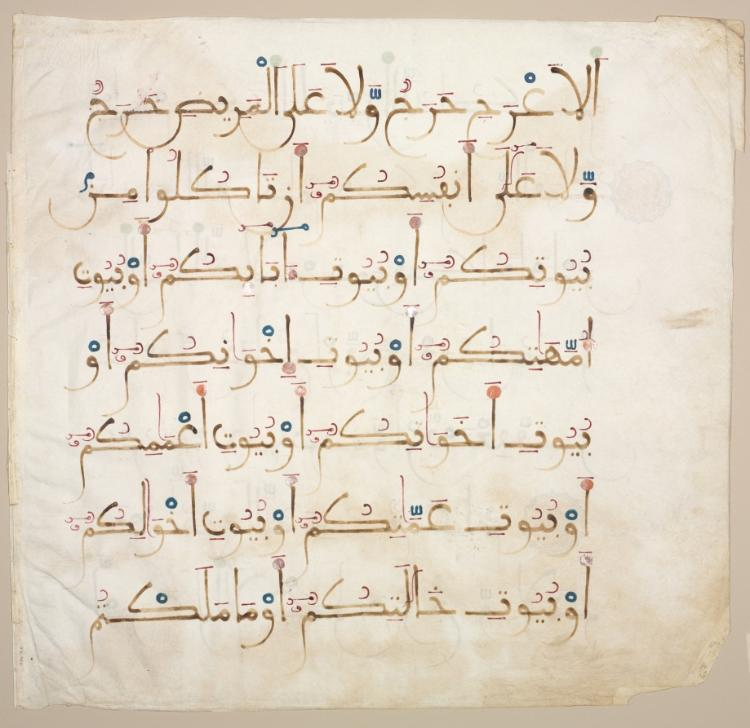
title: Qur'an Manuscript Folio (verso)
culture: Southern Spain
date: 1200s–1300s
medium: ink, gold, and color on parchment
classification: Manuscript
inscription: Sura-al Nur [Chapter:The Light] 24:part 61-part 61 (Arabic) Script: Maghribi (seven lines to a page)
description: This page from the “Chapter of Light” (24:59–61) in the Qur'an is written in the monumental script of Islamic Spain and North Africa, known as Maghribi Kufic. Words flow rhythmically with curving flourishes toward the left margin where letters end in almost perfect semicircles, an elegant hallmark that contrasts with the upright shafts. Distinctive markings—vowels in red and diacritics in blue—identify the vocalization of the text, which would have been read or recited aloud to an assembly.